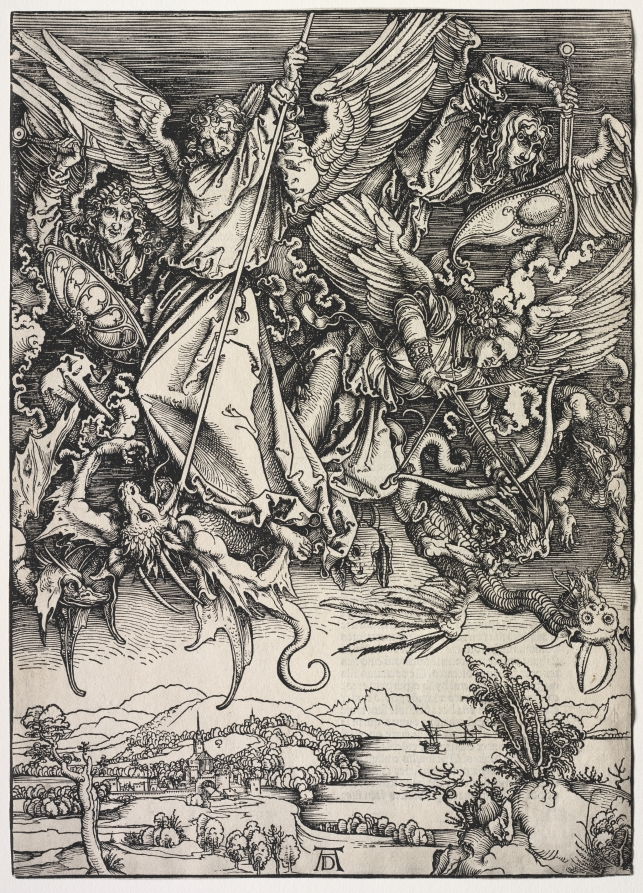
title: Revelation of St. John: St. Michael fighting the Dragon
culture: Germany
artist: Albrecht Dürer (German, 1471–1528)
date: 1511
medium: woodcut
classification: Print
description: This woodcut comes from a series of 15 scenes from the Apocalypse. Dürer drew upon late northern Gothic traditions infused with the reality of spiritual events, biblical interpretation, and dense composition, as well as careful attention to naturalistic details of flora and fauna. He interprets Saint John’s visions by giving them a convincing physical existence. This scene depicts the war in heaven, a final battle between good and evil. Saint Michael and his angels defeat the dragon (Satan) and the other fallen angels, now morphed into repulsive demons, casting them into hell.